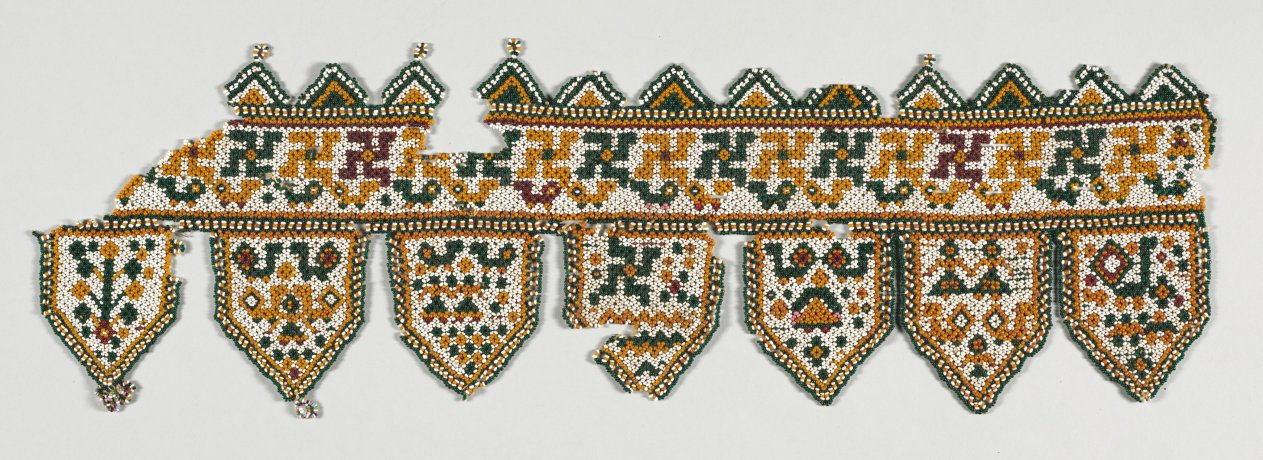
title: Beadwork (for Hanging over Doorways)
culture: India, 19th or early 20th century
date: 1800s or early 1900s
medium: beads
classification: Textile